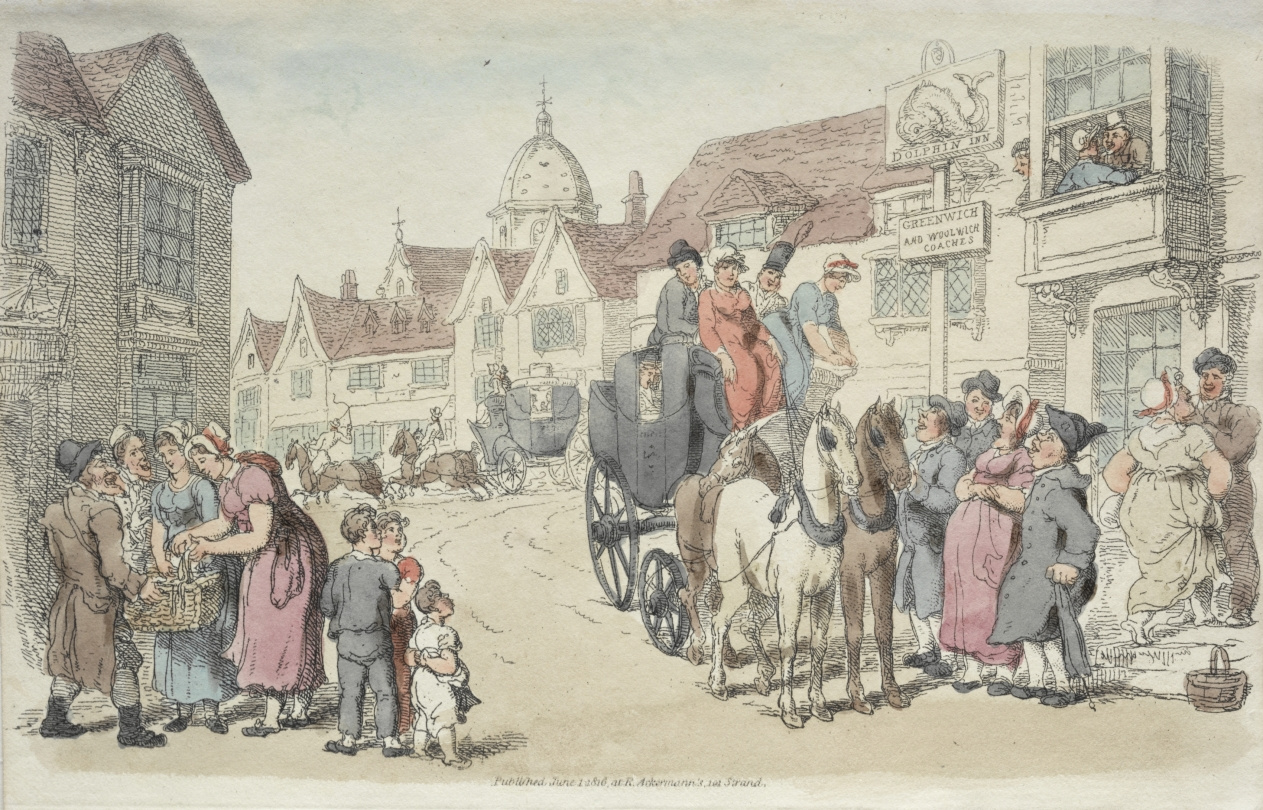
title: Dolphins Inn: Greenwich and Woolwich Coaches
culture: England, 19th century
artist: Thomas Rowlandson (British, 1756–1827)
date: 1816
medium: etching, hand colored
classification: Print